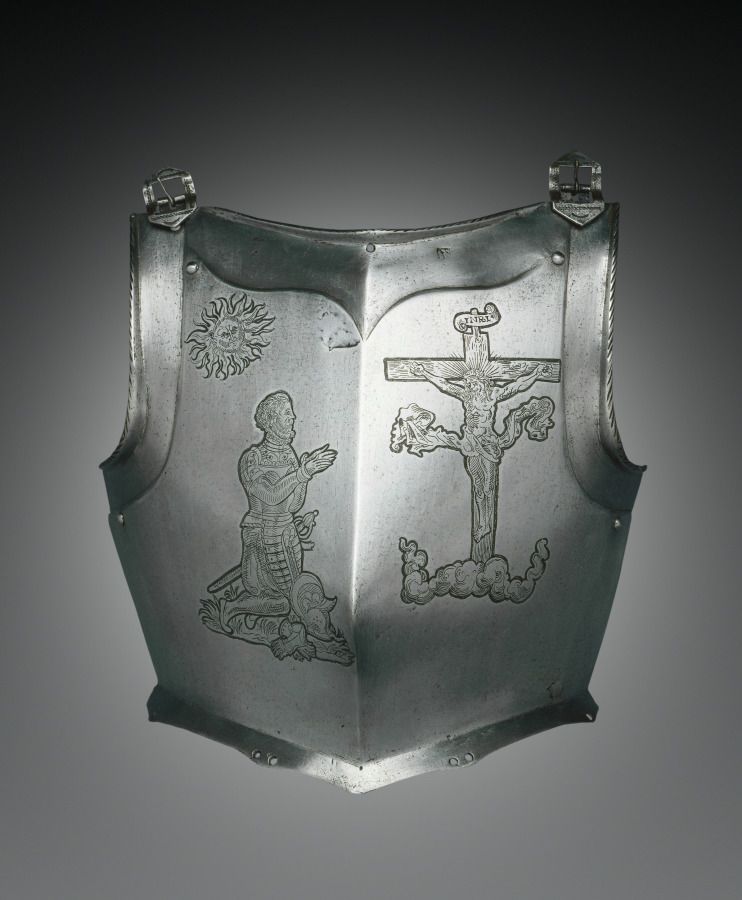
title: Breastplate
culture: Germany, Nuremberg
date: c. 1550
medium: steel with etched figure kneeling before Crucifixion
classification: Arms and Armor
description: This breastplate, lacking its tassets, is nonetheless a fine example of the superb sculptural forms achieved by Renaissance armorers. Its contours and glancing surface illustrate the extremes sought by both armorers and patrons in order to deflect projectiles such as crossbow bolts and thrusting lances. Embellishment was an important aspect of fine armor. This breastplate bears a fine etched decoration of a kneeling knight, possibly the armor's owner, before the Crucifixion. This may have created a kind of personalized devotional image for use in combat.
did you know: Engraving is one of the oldest techniques for decorating metal objects; here the artist used a sharp instrument to scratch the design into the surface.